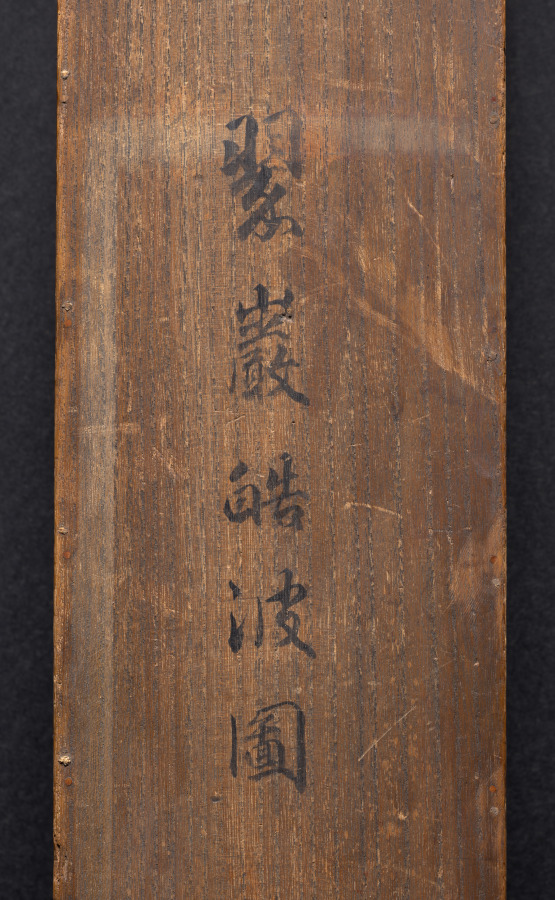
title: Rocks and Waves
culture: Japan, Muromachi period (1392–1573)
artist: attributed to Kano Motonobu (Japanese, c. 1476–1559)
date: early to mid-1500s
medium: sliding door fragment mounted as a hanging scroll; ink and gold wash on paper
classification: Painting